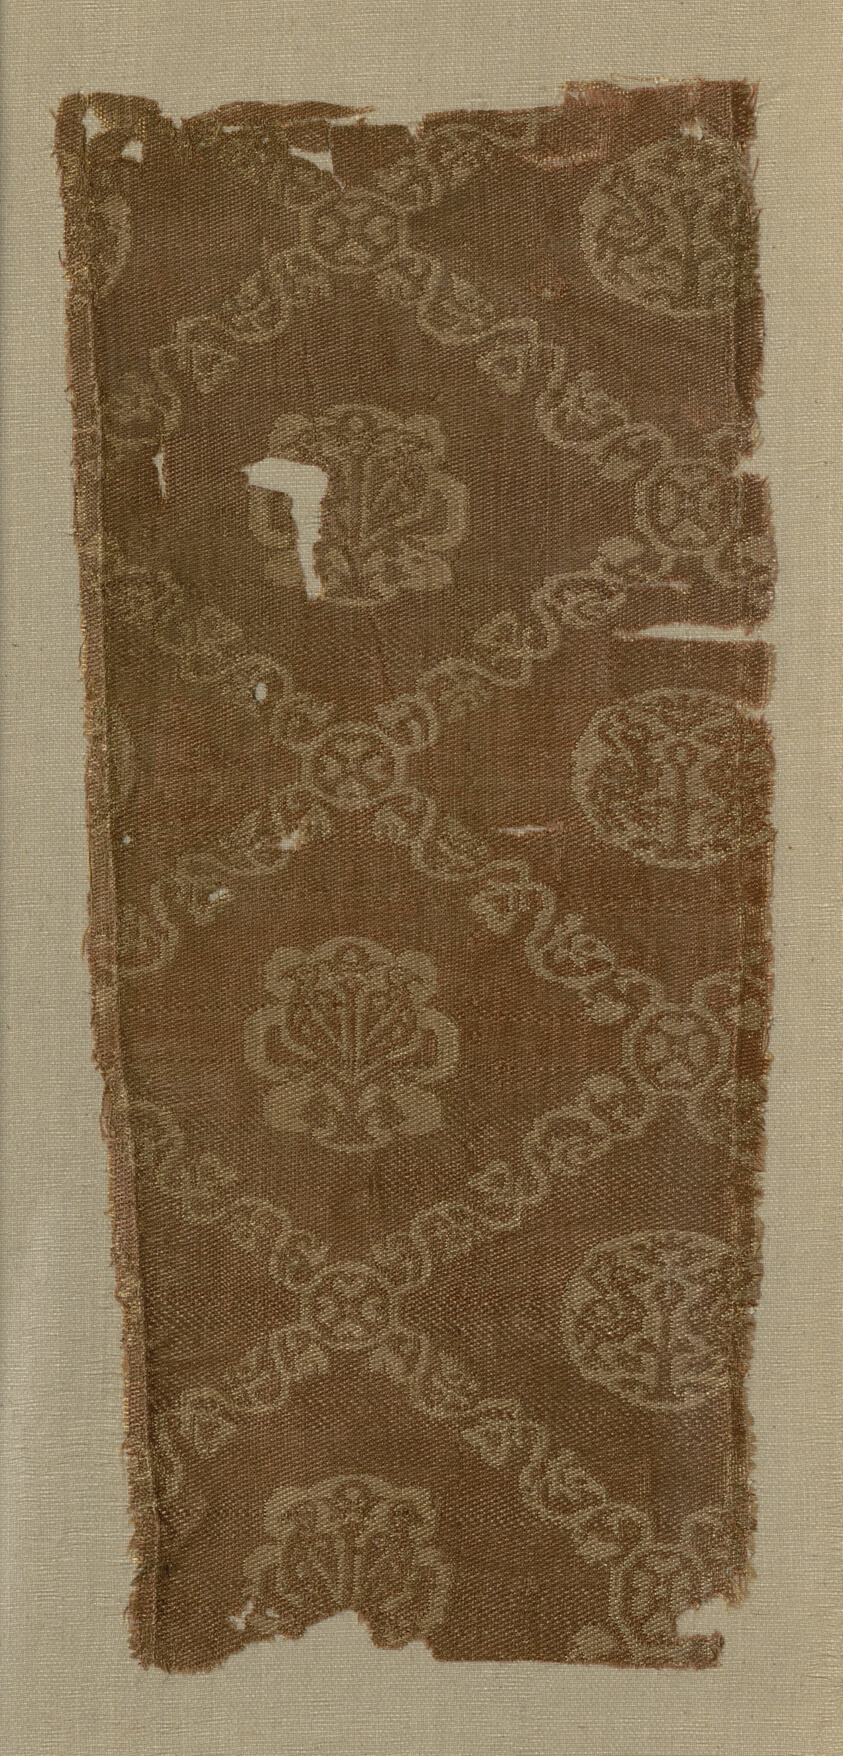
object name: Textile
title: Fragment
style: roman period (egyptian)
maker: Egypt, Akhmîn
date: Roman period (30 B.C.– 641 A.D.)/Arab period (641–969), 6th/7th century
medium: Silk, weft-float faced complementary weft twill weave with inner warps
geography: Egypt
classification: textile; weaving